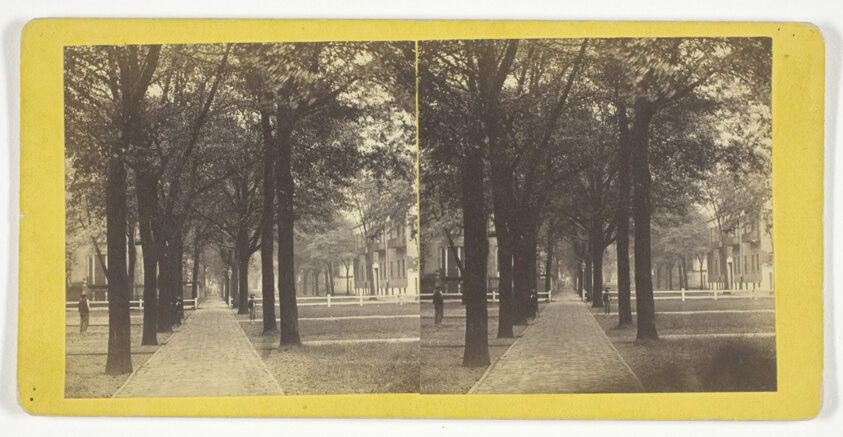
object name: Photograph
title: Bull St. from Madison Square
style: 19th century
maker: J. N. Wilson (American, 1827–1897)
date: 1860/80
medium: Albumen print, stereo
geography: United States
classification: stereograph (albumen); albumen silver print; photographic process; photography; photograph